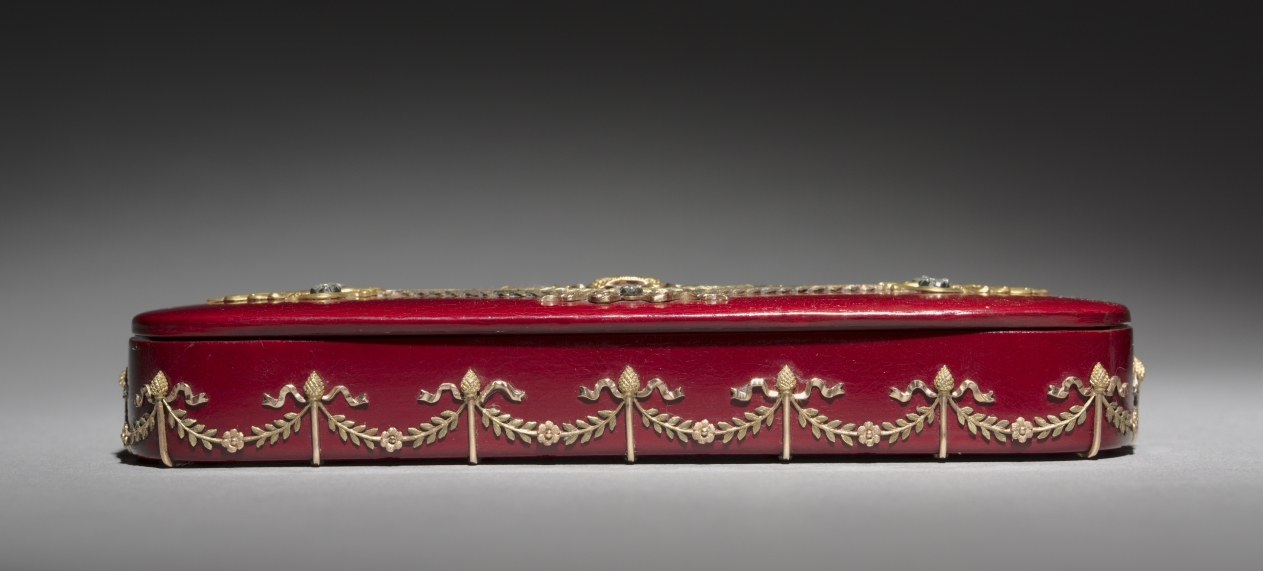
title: Lacquer Box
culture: Russia, St. Petersburg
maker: House of Fabergé (Russian, 1842–1918)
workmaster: Factory N. Lukutin (Russian)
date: c. 1890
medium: lacquer, papier-mâché, gold, diamonds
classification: Miscellaneous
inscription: inscribed (inside cover): Factory N. Lukutine (in Cyrillic script in gold); three double-headed eagles in gold.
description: This lacquer box was created by the Lukutin Factory, which was well known for creating boxes such as this one after Piotr Lukutin took charge of production and expanded the factory to include tea caddies and various desk accessories. This particular box from the Lukutin workshop is remarkable in its detailed gold patterns and diamond inlays that create an intentional contrast with the deep red surface.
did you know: Piotr Lukutin’s workshop employed over 50 skilled painters as well as acted as a school for training apprentices.